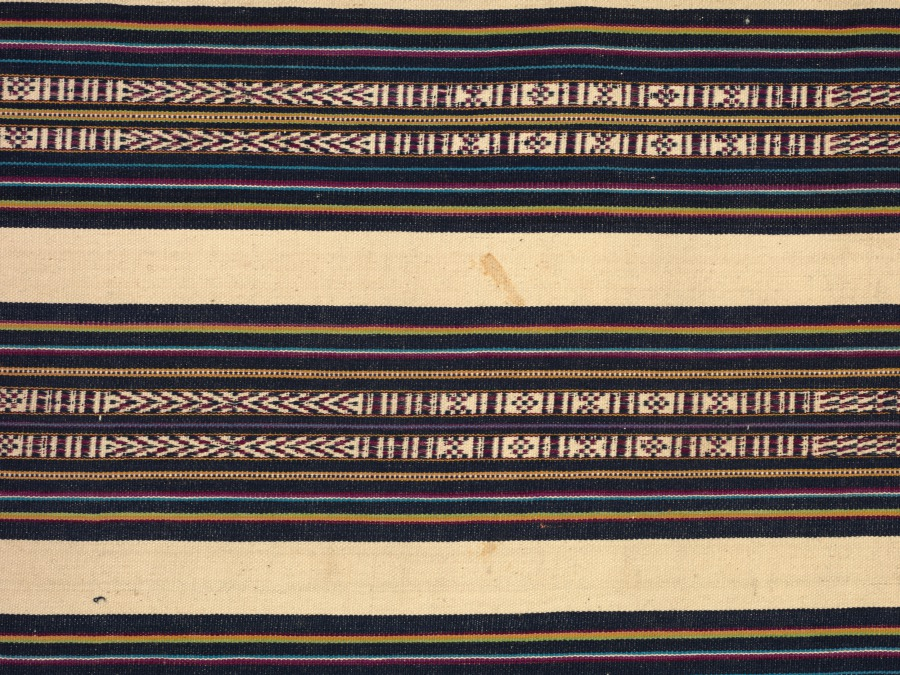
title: Textile Hanging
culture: Tibet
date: 1900–1915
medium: wool and cotton: warp faced plain weave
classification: Textile